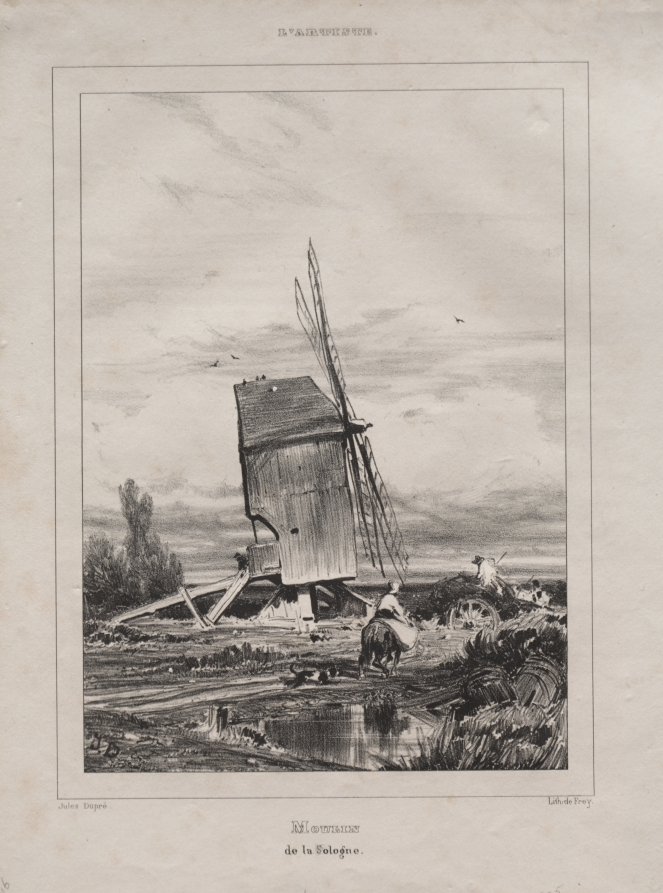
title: Mill in the Sologne, France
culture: France, 19th century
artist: Jules Dupré (French, 1811–1889)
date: 1835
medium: lithograph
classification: Print